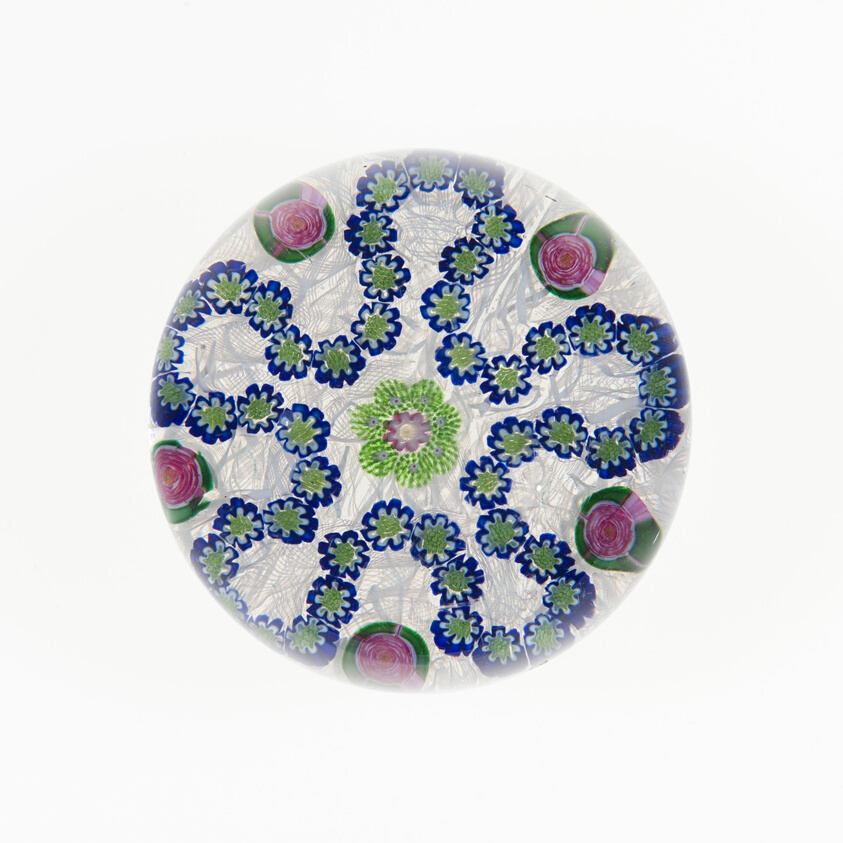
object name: Glass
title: Paperweight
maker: Clichy Glassworks (Cristalleries de Clichy); Clichy, France, 1837-1885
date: c. 1845/60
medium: Glass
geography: France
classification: paperweight; glass